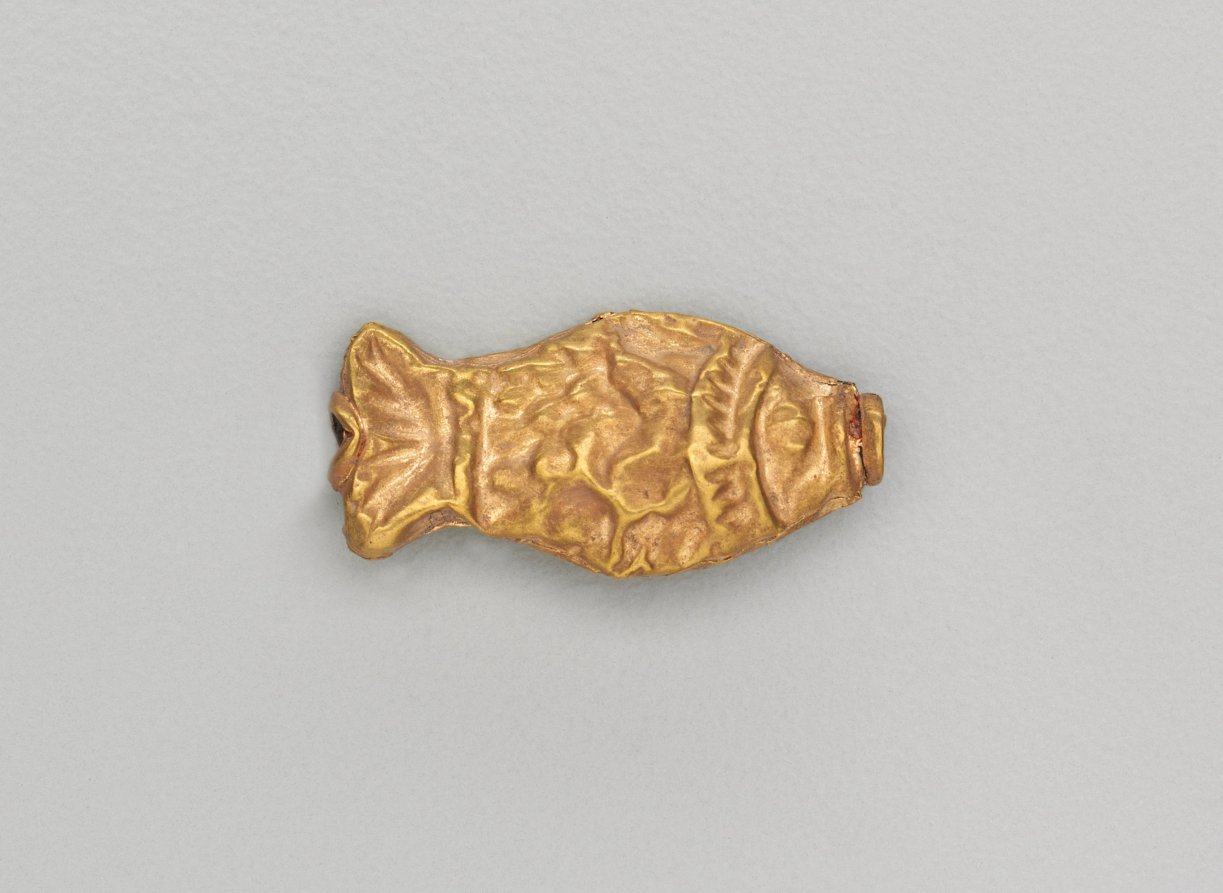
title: Necklace Bead in the Form of a Fish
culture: India, Shunga period (185–78 BCE)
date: 185–72 BCE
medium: gold repoussé with granulation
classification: Jewelry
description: Jewelry in ancient India often consisted of elements associated with water, such as fish and other aquatic plants and animals. Since water is essential for life, imagery that connotes water is life-affirming, or auspicious, and therefore appropriate adornment.